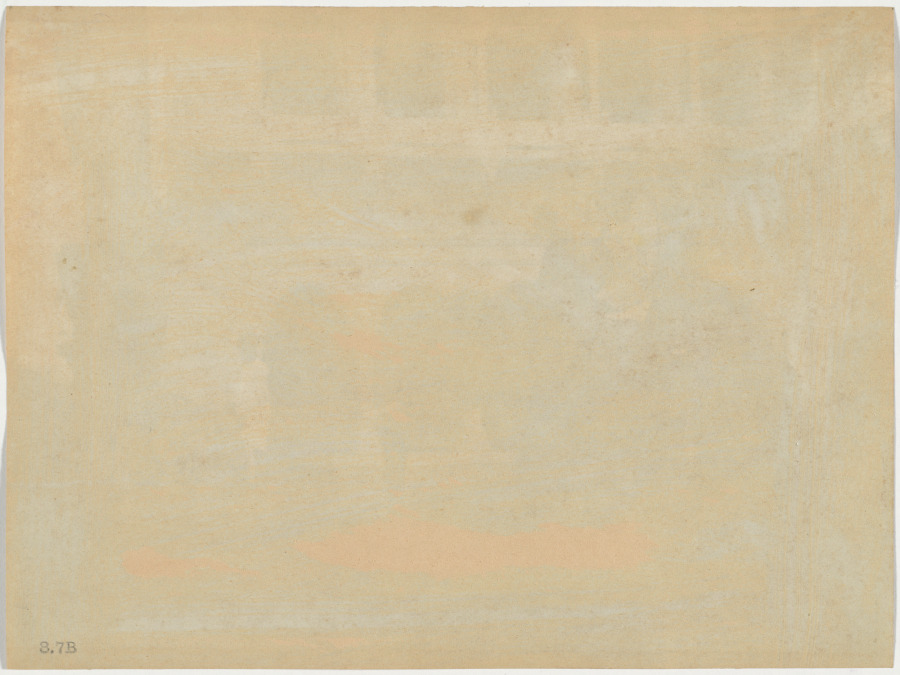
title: Ramkishore Singh of Rewa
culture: India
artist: Raja Deen Dayal (Indian, 1844–1905)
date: 1886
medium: albumen print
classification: Photograph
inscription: Imprinted in black ink on verso: “24.6L”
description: Ramkishore Singh, likely a high-ranking official or merchant, is depicted twice in the album, each time aboard a luxurious type of transport. In one photograph, he rides atop an elephant, a creature associated with India, power, and fortitude, preceded by an attendant on horseback. In the other, he rides in a European-style carriage pulled by two horses, flanked by attendants on camels (native to parts of India) and horses. Like the images of Britons in their carriages and rickshaws, these depictions suggest the sitter’s wealth through his possession of servants, animals, and vehicles.